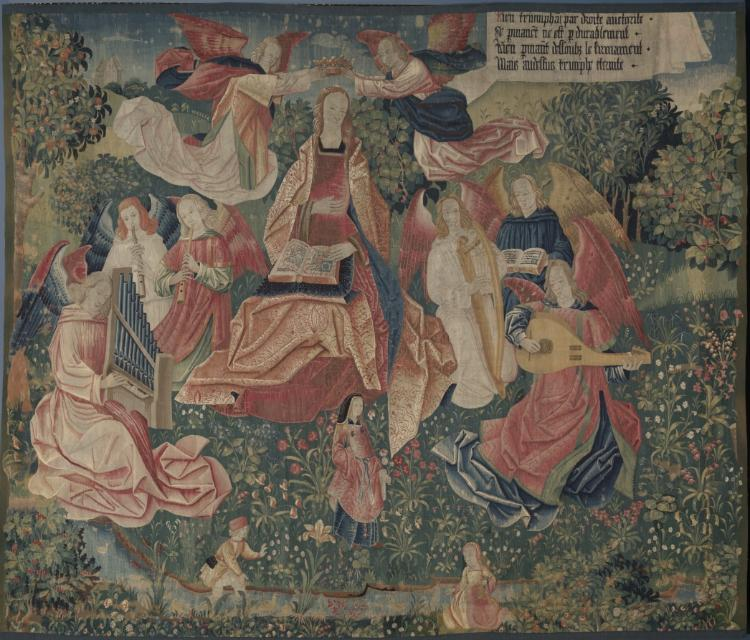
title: The Triumph of Eternity (from Chateau de Chaumont set)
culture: France, Lyon(?), early 16th century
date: 1512–15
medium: silk and wool; tapestry weave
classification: Tapestry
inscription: French verse in Gothic letters translates as follows: "Nothing triumphs by right authority, Unless it be conducted by Eternity. Nothing is permanent beneath the firmament, But above us triumphs Eternity."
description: The Triumph of Eternity is represented by the Coronation of the Virgin. Dressed in crimson velvet with an opulent brocaded velvet shawl, the Virgin is seated in the center as two angels hold a crown over her head. Five musical angels surround her playing an organ, recorder, straight cornetto, harp, and lute, while another sings from an open music book. The scenes in the set display a conservative style in which the figures are placed in shallow landscapes, thereby ignoring pictorial innovations for depicting space and mass. The verse in Old French at the top states: Nothing triumphing by due authority Remains permanent and durable. Nothing is permanent under the heavens, But above, eternity triumphs.